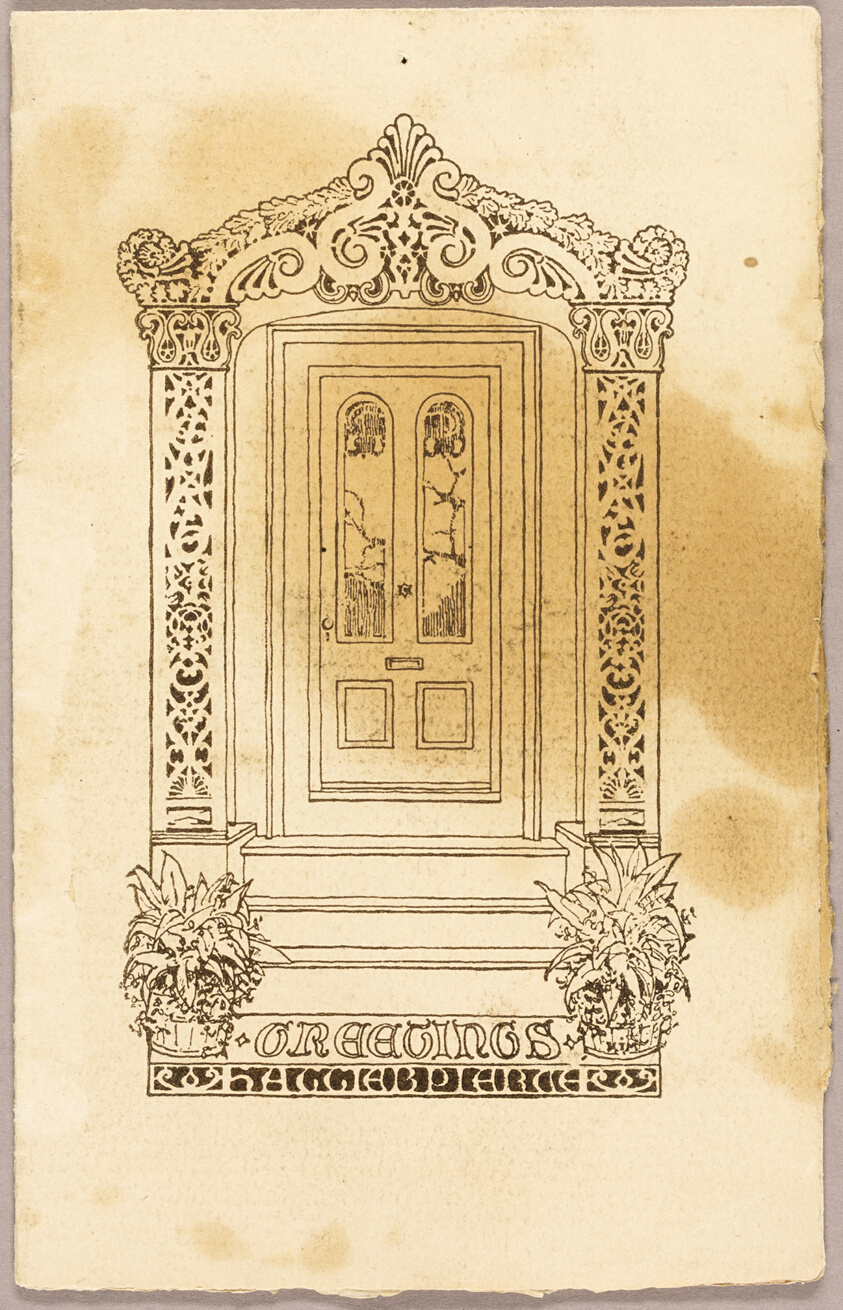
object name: Decorative Arts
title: Letterpress print (as companion to Doorframe, 2008.554)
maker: Artist unknown; American, 19th century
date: 1850/1900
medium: Ink on paper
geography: United States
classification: ink; decorative arts; prints and drawing